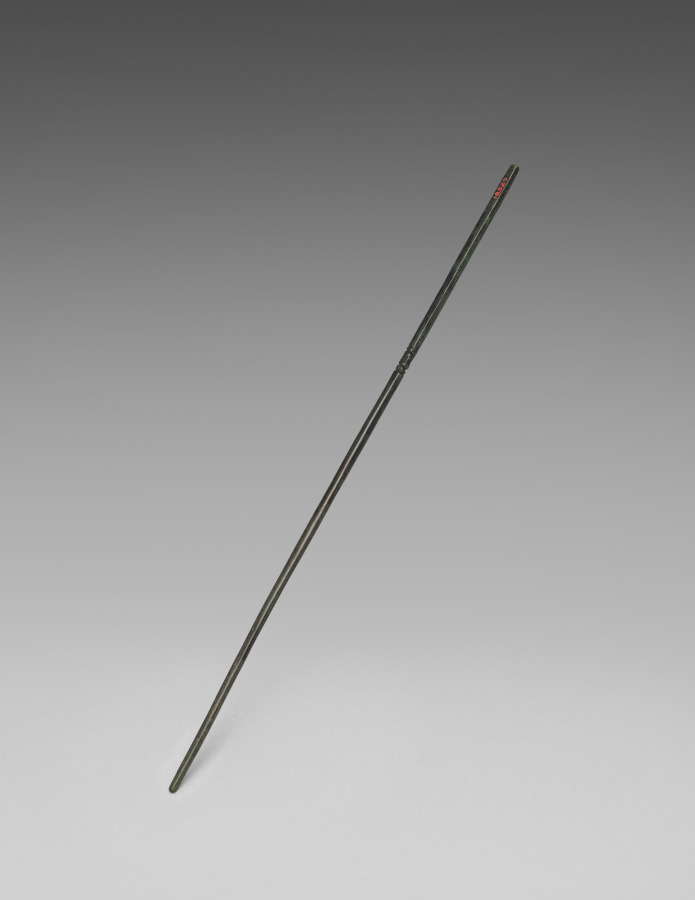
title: Chopstick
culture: Korea, Goryeo dynasty (918–1392)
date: 918–1392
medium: bronze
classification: Metalwork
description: In Korea, chopsticks made of metal such as brass, silver, and gold were excavated from ancient tombs and ruins dated to the 6th century at the earliest. Burial goods often include utilitarian objects such as table wares and utensils because the dead were believed to need them in the afterlife.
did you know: In contrast to the Chinese and Japanese, Koreans still prefer metal chopsticks (stainless steel and brass) to wooden ones.